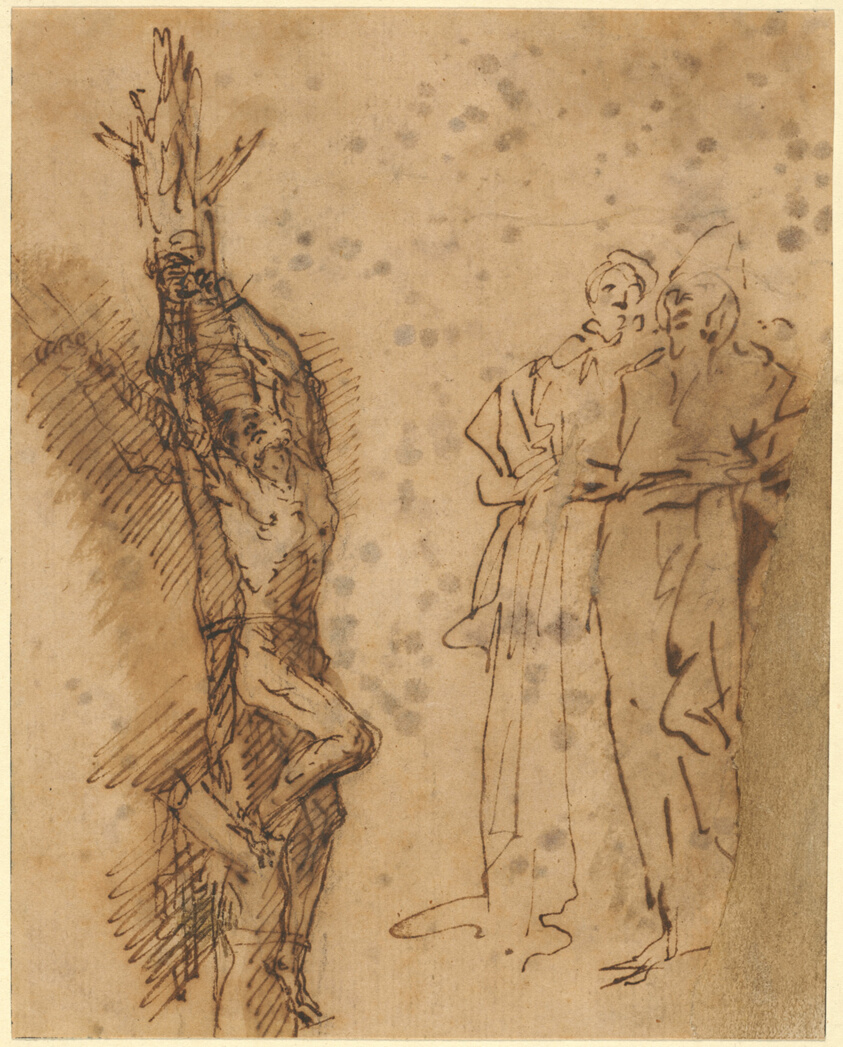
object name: Drawing and Watercolor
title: Study for Polycrates’ Crucifixion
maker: Salvator Rosa (Italian, 1615-1673)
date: c. 1662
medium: Pen and brown iron gall ink, with brush and brown wash, over traces of graphite on buff laid paper, laid down on cream laid paper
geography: Italy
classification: prints and drawing; drawings (visual works)